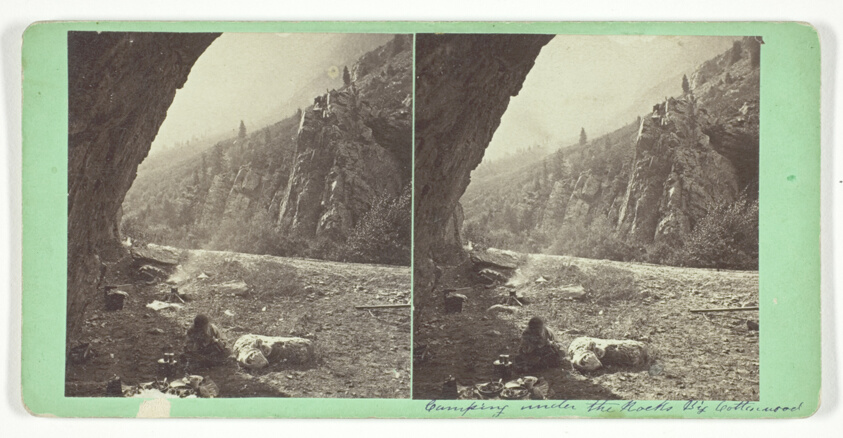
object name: Photograph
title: Camping Under the Rocks, Big Cottonwood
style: 19th century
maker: Charles Roscoe Savage (American, born England, 1832–1909)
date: 1859/62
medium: Albumen print, stereo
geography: United States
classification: stereograph (albumen); albumen silver print; photographic process; photography; photograph